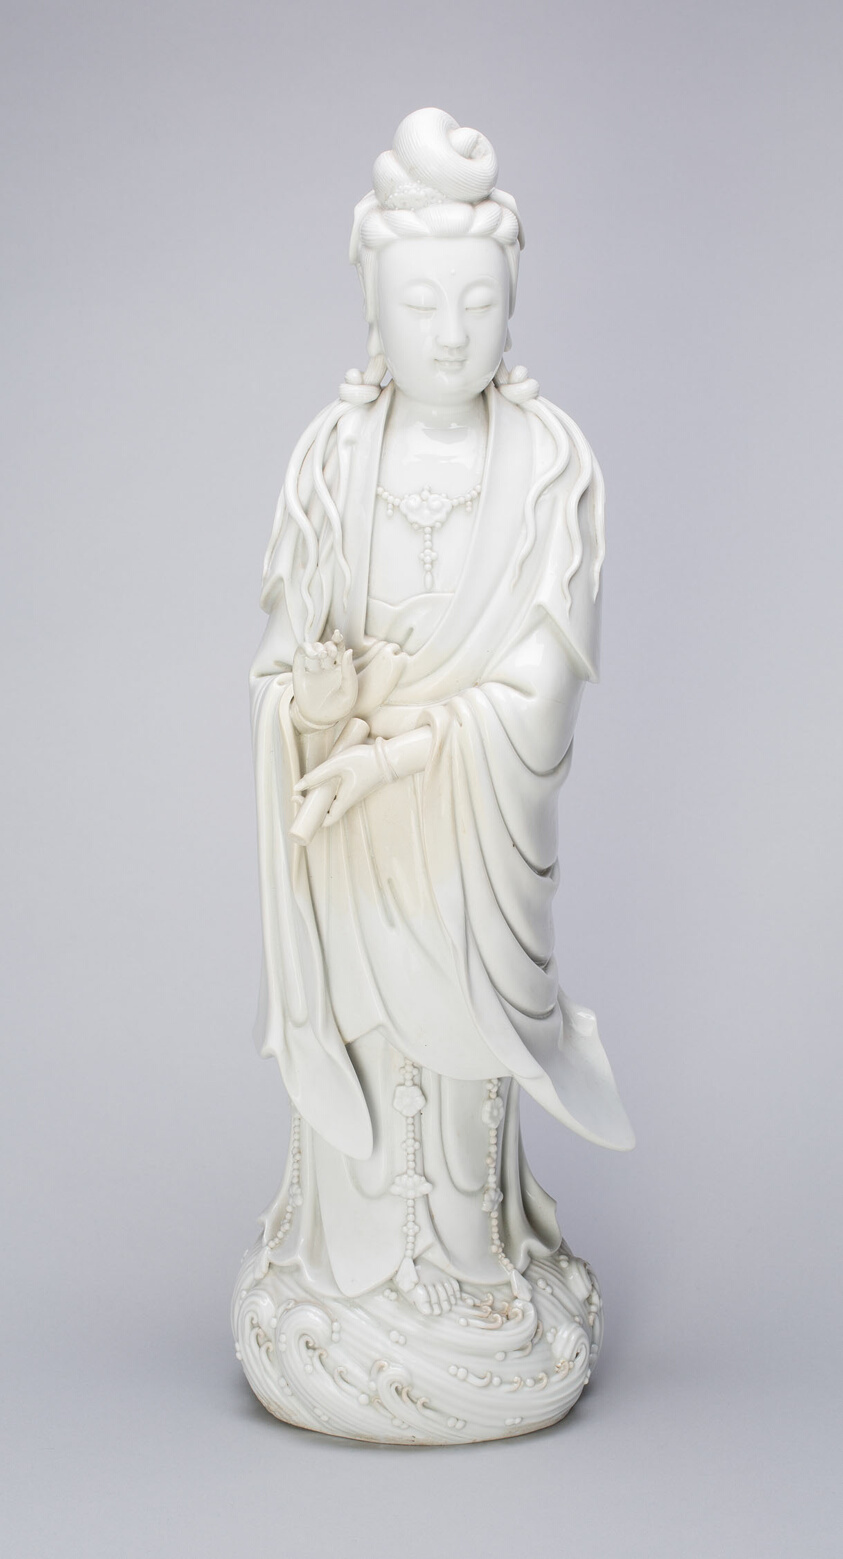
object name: Decorative Arts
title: Standing Guanyin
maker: China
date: 17th–18th century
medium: Dehua ware (blanc de chine); porcelain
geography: China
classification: porcelain; ceramics; asian art